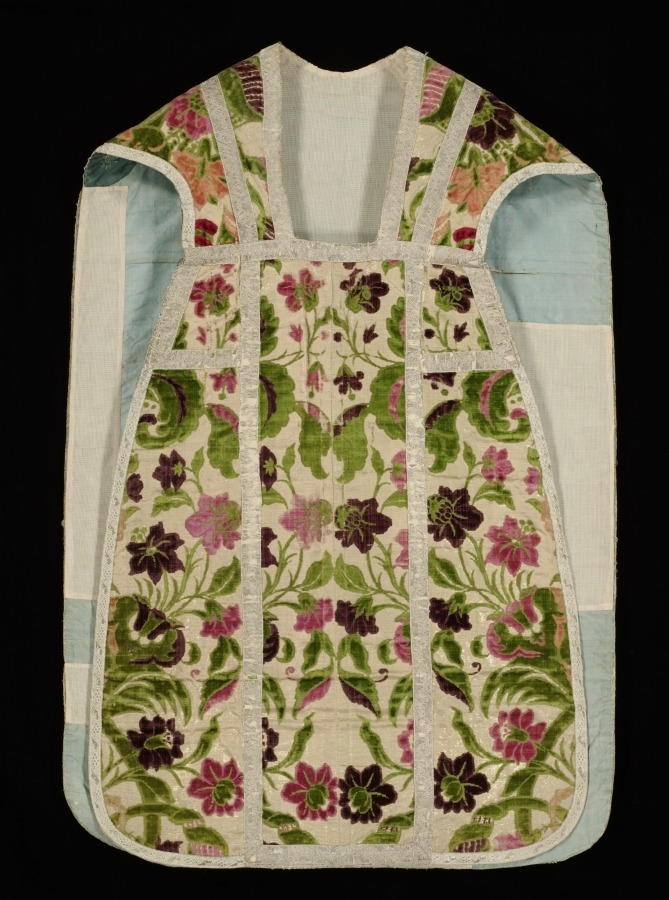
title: Chasuble, Stole, Burse (Corporal Case), and Maniple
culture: Italy, Genoa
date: 1600s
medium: woven polychrome silk and gilt metal threads, cut and uncut velvet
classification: Velvet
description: This sumptuous polychrome velvet displays a central vase with abundant flora and exotic leaves flanking curving blossoming fronds on a gilt-metal thread ground. The pattern was created with five colors of cut and uncut (loops) velvet pile. Only the pile warps for the lush green velvet occur across the entire cloth, while each additional color appears in vertical stripes—crimson, peach, rose, and purple. These widely acclaimed velvets from Genoa were the most colorful woven in Europe. Both the long stole and the shorter maniple are insignia of the office of deacons, priests, and the higher clergy. The stole was worn under a chasuble according to the office and the maniple was hung on the left forearm. The burse is a stiff receptacle in which the folded corporal, a white linen cloth on which the sacred bread and chalice are placed during the Mass, is carried to and from the altar. The upper fabric matches the chasuble, the bottom is a plain silk, and the interior has an obligatory linen lining.